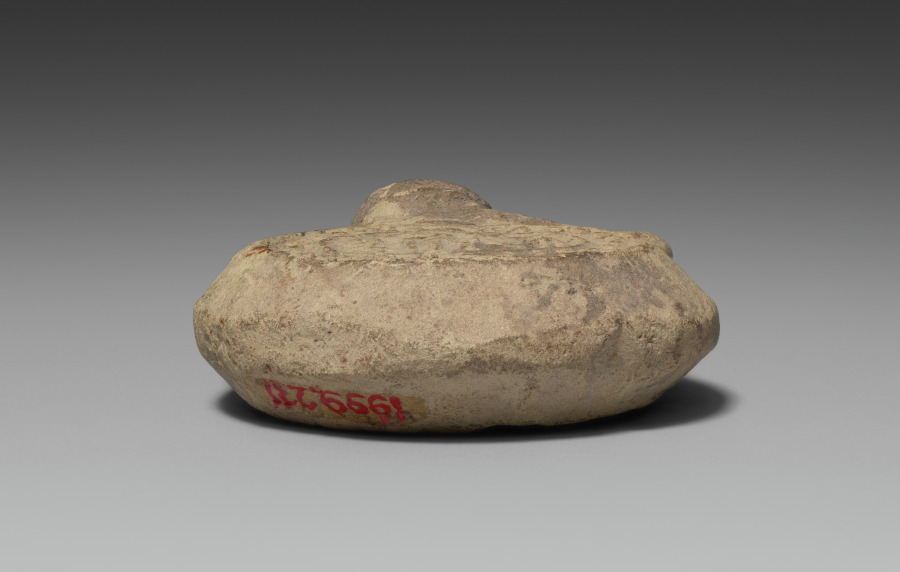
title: Pilgrim's Flask with Saint Menas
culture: Byzantine Empire, Abu Mena (Egypt)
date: 400–600 CE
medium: terracotta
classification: Ceramic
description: These flasks bear the image of Saint Menas, an early martyr of the Christian Church whose shrine was in the desert southwest of Alexandria in Egypt. These flasks were probably used by pilgrims to hold oil taken from the lamp that burned over this saint's tomb. Probably manufactured near the shrine, pilgrim's flasks often bear decorations hinting at their place of origin, as is the case here.